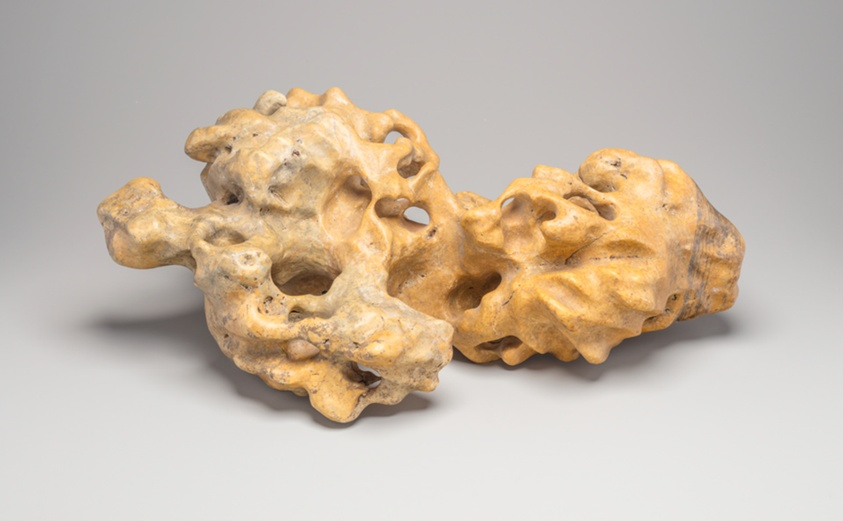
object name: Sculpture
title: Scholar's Rock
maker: China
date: Qing dynasty (1644-1911), 18th century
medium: Yellow wax stone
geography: China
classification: decorative arts